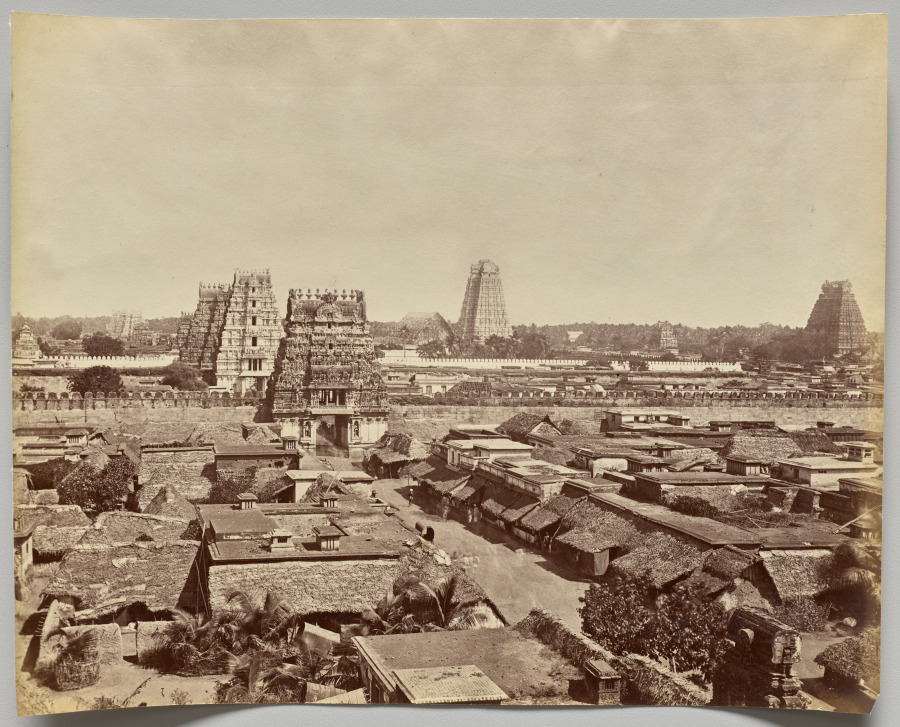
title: View from the Top of the Rock, looking over the native Town, Trichinopoly, India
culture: India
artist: Nicholas & Co. (British, active India, 1873–1905)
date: 1878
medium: albumen print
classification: Photograph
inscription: Embossed stamp at bottom right: "Nicholas & Co. Madras"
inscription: Written in graphite on verso: "71 Sheeruu Guru General View (?)"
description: The Ranganathaswamy Temple, dedicated to the god Vishnu, originated in the 1st century CE and is still active today. This view sets the gopura (temple entrance towers) in their urban context and juxtaposes the vast scale of the complex against the much humbler buildings where the Indian population lived and worked. To see carvings inside the temple complex, look at 2015.37 in the collection.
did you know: The towers in the background mark the largest temple compound in India, which occupies 156 acres.